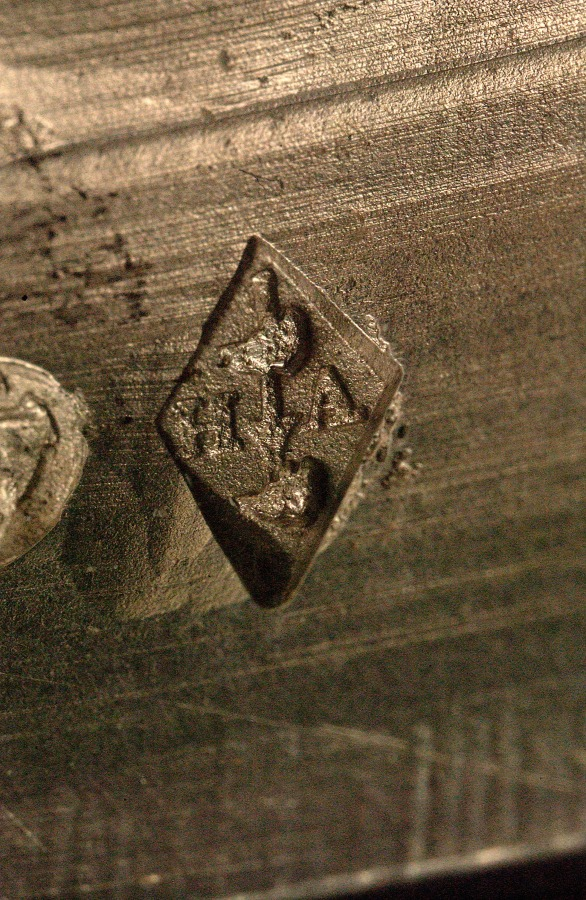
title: Covered Tureen on Stand (Pot à oille)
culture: France, late 18th-early 19th Century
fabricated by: Henry Auguste (French, 1759–1816)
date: 1797–98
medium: silver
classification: Silver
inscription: [Coat-of-arms of Amoral don Federico Carlos Gravina on bowl; cover; stand]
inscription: [Assay mark for large-sized work, 1798-1809, lining exterior; tureen foot exterior]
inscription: [Assay mark for medium-sized work, 1798-1809, beneath stand foot; on edge of cover]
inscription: [Maker's mark of Henri Auguste, master silversmith in 1785, beneath tureen foot; beneath stand foot; inside stand foot edge]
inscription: [Official assay mark for first standard silver, Paris, 1798-1809, beneath stand foot; lining exterior; on cover]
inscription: [Official mark for silver imported from countries with customs conventions, 1838-1912, beneath stand foot; edge of cover; tureen lip exterior; lining exterior; on one tureen handle; outside stand foot; tureen foot exterior]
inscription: [Unknown mark, possibly Ceres' profile in square with "E" and "7", beneath stand foot; on cover; rim of lining; tureen foot exterior; tureen lip exterior]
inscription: [Unofficial assay mark for first standard silver, Paris, 1794-1797, beneath foot stand; beneath tureen foot; near tureen handle exterior]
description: This pot-à-oille was designed by master goldsmith Henri Auguste after drawings by draftsman and sculptor Jean Guillaume Moitte. Though many of the neoclassical decorative elements on this piece are pulled from Moitte’s design, Auguste’s final product leaves out much of the proposed ornamentation. Instead this object finds distinction in its large size and smooth expanses of silver that emphasize the purity of its lines.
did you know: The coat of arms on the body of the work corresponds to the family of Federico Carlos Gravina, a Sicilian-Spanish admiral who was known to have had a close diplomatic relationship with Napoleon I.